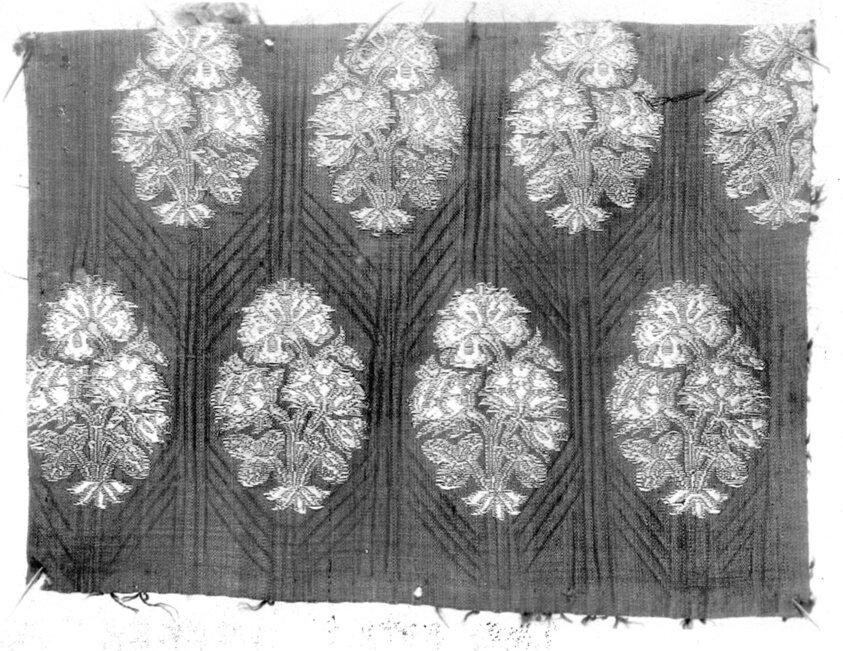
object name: Textile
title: Fragment (Dress Fabric)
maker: Iran (Persia)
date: 18th century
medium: Brocaded plain compound cloth in silk and gold wound on yellow silk core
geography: Iran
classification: textile; weaving